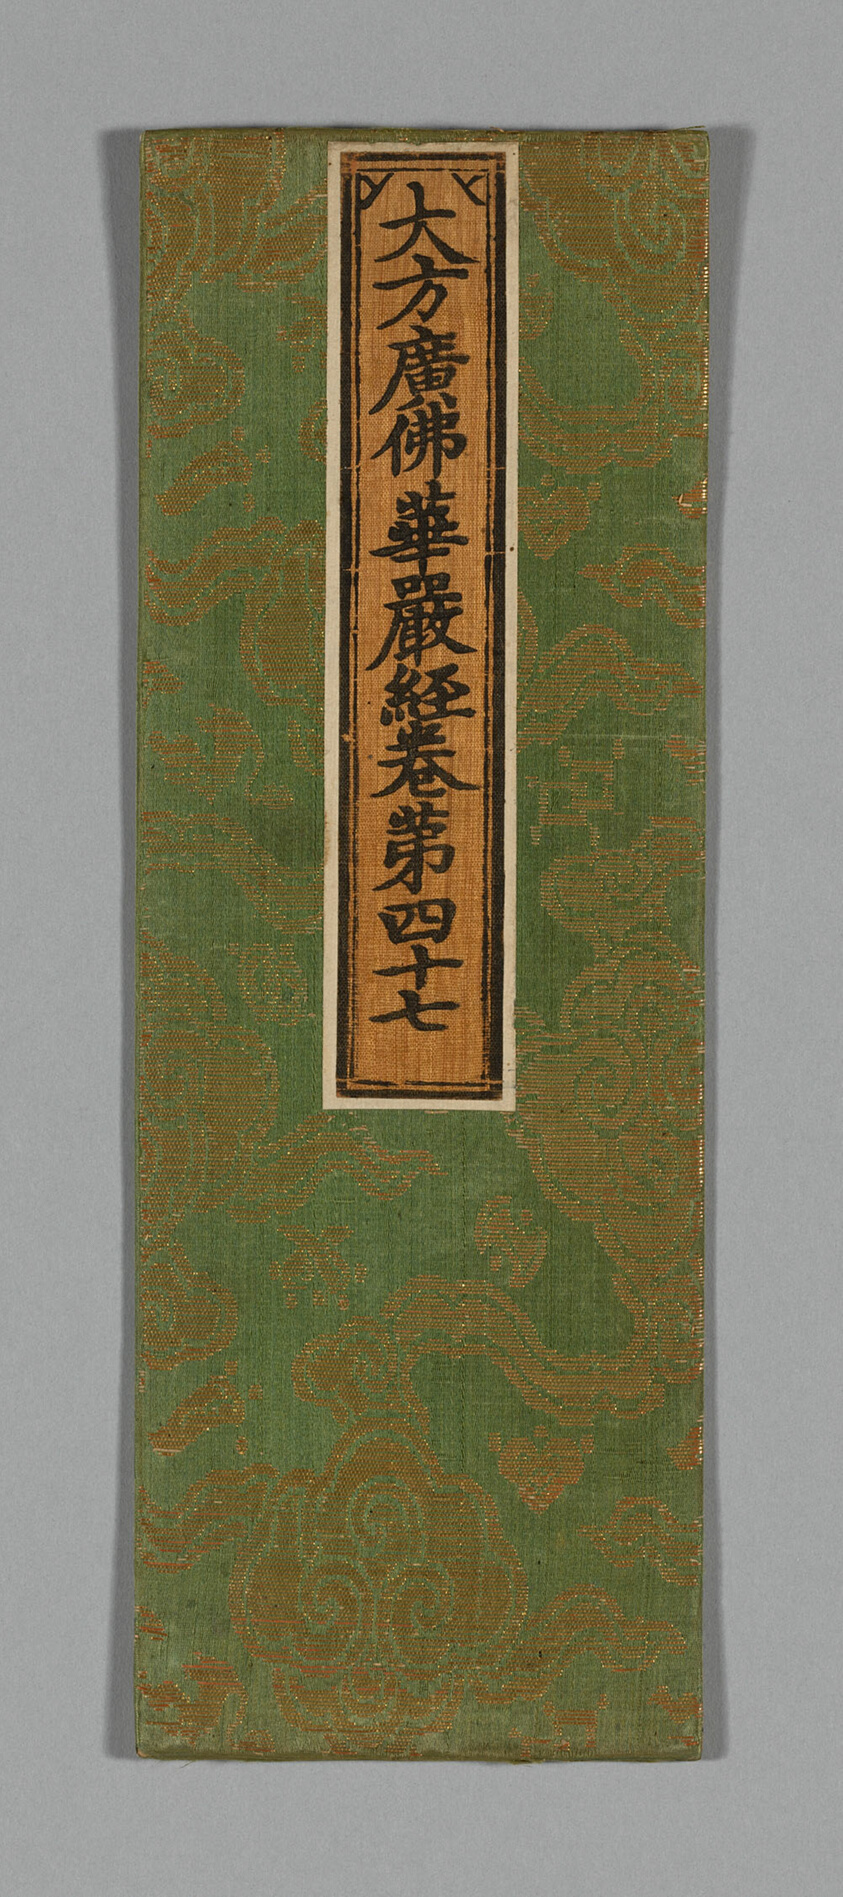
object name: Textile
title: Sutra Cover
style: ming, Chinese (culture or style), East Asian, asian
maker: China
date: Ming dynasty (1368–1644), c. 1590's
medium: Silk and gold-leaf-over-lacquered-paper strip, warp-float faced 4:1 satin weave with supplementary patterning bound in 1:4 weft-float faced satin interlacings; label: silk, plain weave; painted with ink, paper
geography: China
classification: textile; weaving